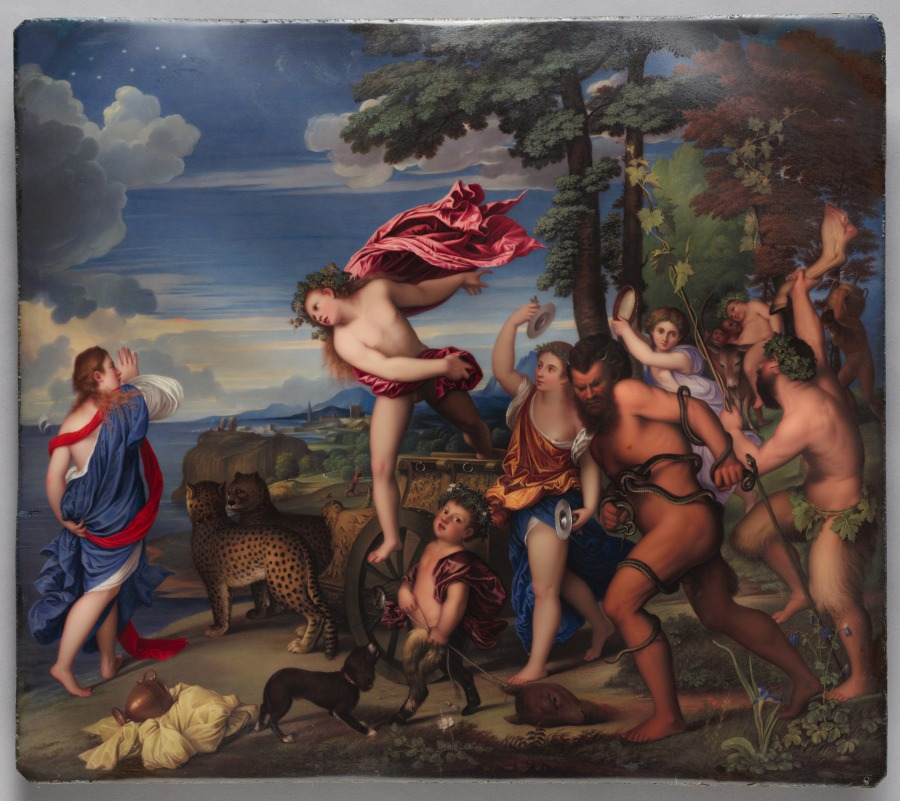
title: Bacchus and Ariadne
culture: England, 19th century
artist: Henry Bone (British, 1755–1834)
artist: after Titian (Italian, c. 1488–1576)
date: 1808–11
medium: enamel, in original gilt-wood and gesso carved frame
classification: Miniature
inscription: Signed and dated H Bone, 1811 on the recto (on the urn, lower left), inscribed on frame mat at bottom right: ENAMEL HBONE, and signed, dated and inscribed in full on the counter-enamel "painted by Henry Bone R.A. Enamel painter in Ordinary to His Majesty and Enamel painter to His Royal Highness the Prince of Wales, after the Original by Titian in the Collection of the Rt: Honble: Lord Kinnaird &c &c &c.____ This Picture the most celebrated amongst the Bacchanalian Subjects of Titian (when patronis'd by Alphonso Duke of Ferrara) was ultimately brought to this Country from the Villa Aldobrandini in Rome in 1806, from whence it was imported by Willm. Buchanan Esq.____ Size of the Original 6 feet 2 inches, by 5 ---- 10 ---- This Enamel picture w[as] began July 30th 1808 and finish'd March 1811. ___ (HB. Elected a Royal Academician Feby. 11th 1811)"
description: Henry Bone devoted three years to creating this work, a tremendous technical achievement and the largest enamel on copper that had ever been made. The painstaking process required each application of color to be fired at a different temperature in the kiln. The enamel exactly reproduces Titian’s Bacchus and Ariadne (now in the National Gallery, London), an early sixteenth-century Italian masterpiece that had recently come into an English collection. The elaborate carved and gilded wood frame was specially designed for the work, an indication of the cultural value placed on great enamel reproductions of famous paintings. Bone was unable to show his masterwork at the annual Royal Academy exhibition in 1811 because the Prince of Wales had asked to see it. When the prince decided not to purchase it, Bone issued more than 4,000 tickets for visitors to view the work in his studio.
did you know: Henry Bone was known for his enamel paintings created through a laborious process of fusing painted glass to copper and firing at controlled temperatures.